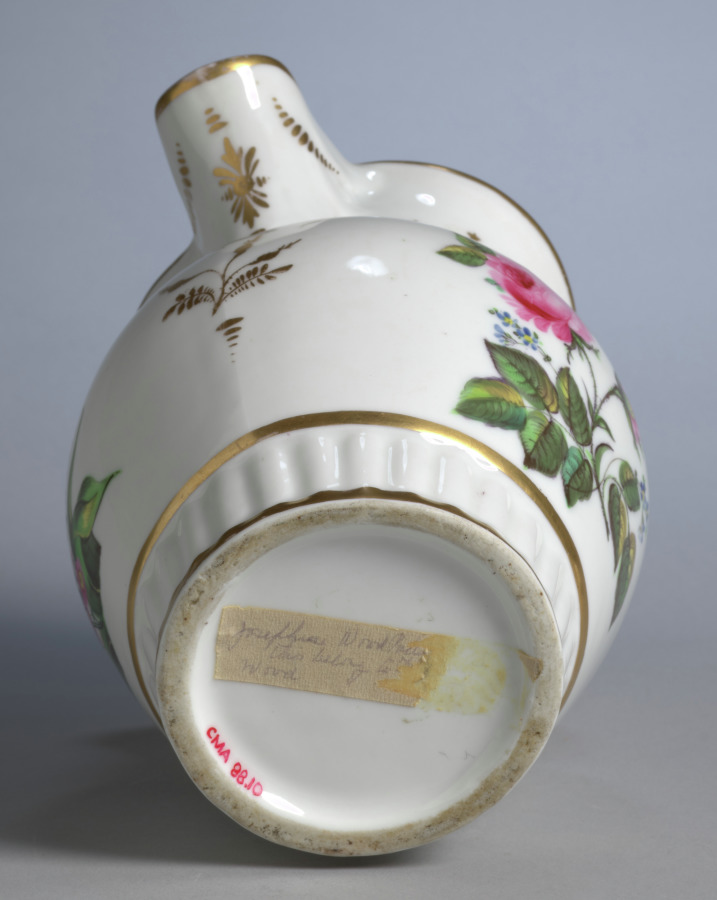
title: Pitcher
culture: America, Pennsylvania, Philadelphia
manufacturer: Tucker Factory (American)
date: c. 1830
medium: porcelain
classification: Ceramic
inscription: bears tape on bottom inscribed: Josephine Wood [Price?] / this belongs to [---] / Wood.